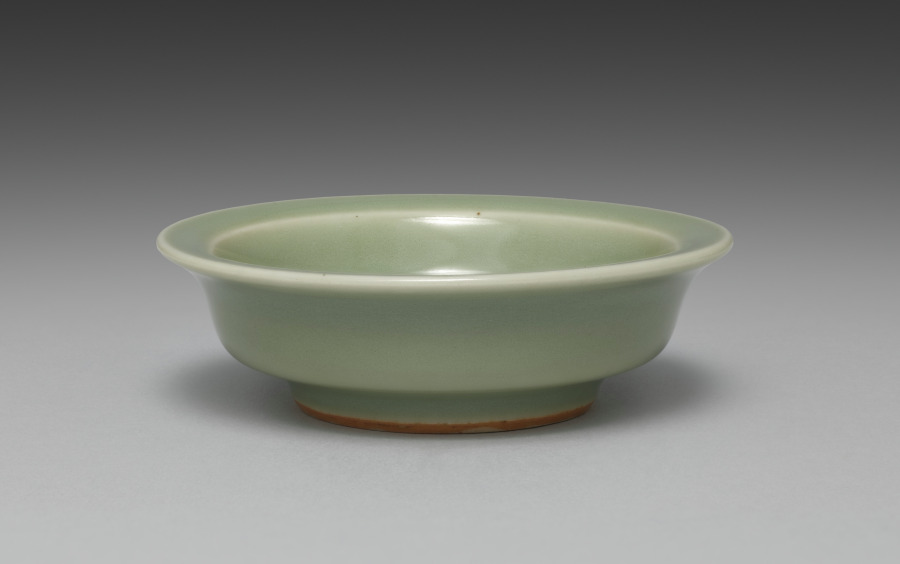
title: Saucer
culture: Japan, Meiji period (1868–1912)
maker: Seifū Yohei III (Japanese, 1851–1914)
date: 1893–1914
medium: One from a set of ten dishes; porcelain with green glaze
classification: Ceramic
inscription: 清風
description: Yohei III’s main output for his sophisticated clientele was in the form of tea sets and dining sets. He created a range of dishes in green glazes. He often produced in pairs, sets of five, or sets of ten. For this set of ten small dishes in a simple, round form that emphasizes the glaze above all, the box lid designates the piece as seiji, or green-glazed porcelain, using a general term for the extensive palette of green glazes often called celadon in English. The box lid further identifies the dishes themselves as tōchō, literally “bean-sized saucers,” a size that makes them suitable for dipping sauces.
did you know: The ten dishes in this set are stored in stacks of five in a two-compartment box.